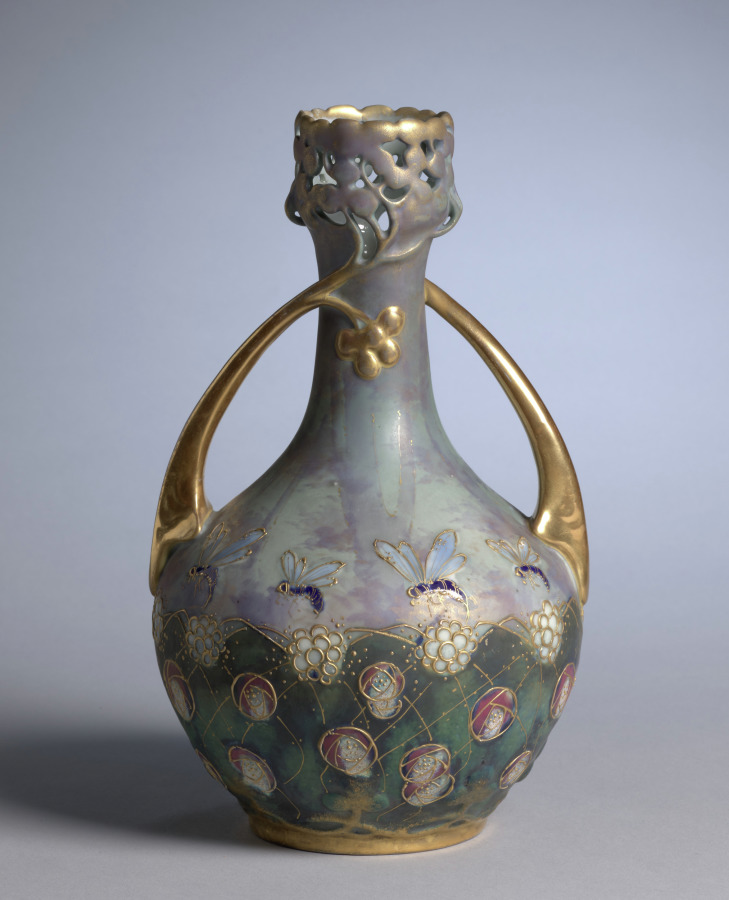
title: Vase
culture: Czech Republic, Turn-Teplitz, early 20th Century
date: c. 1900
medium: porcelain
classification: Ceramic